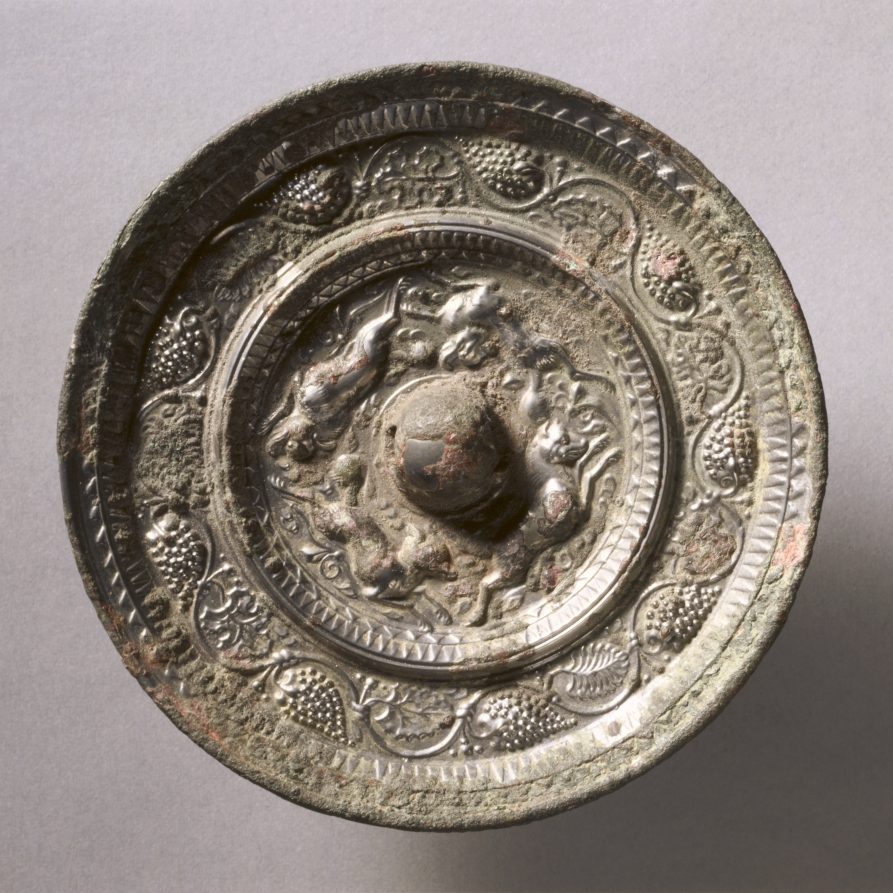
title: Animal-and-Grape Mirror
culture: China, Tang dynasty (618-907)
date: early to mid 600s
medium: bronze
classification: Metalwork